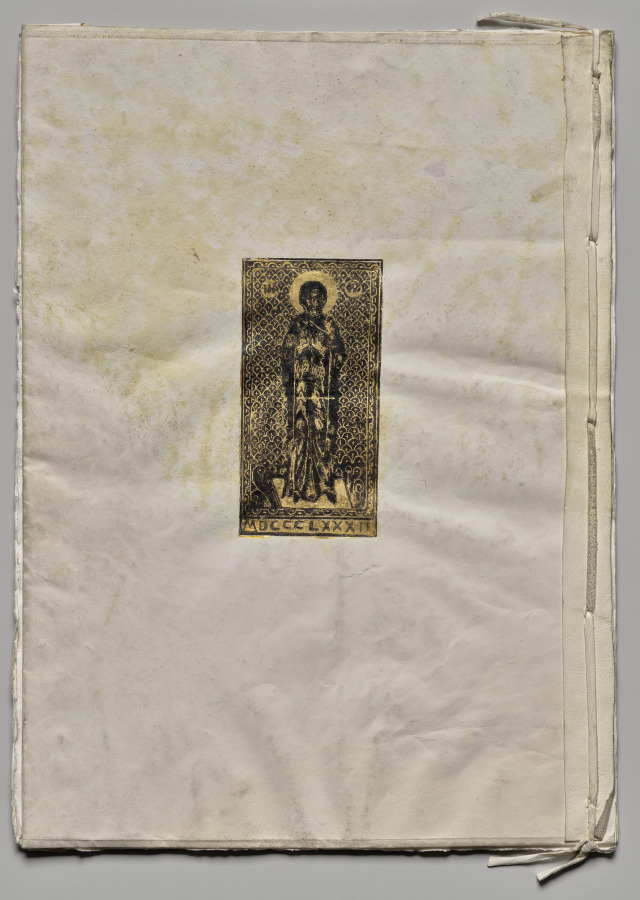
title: Etchings of Venice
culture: America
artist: Otto H. Bacher (American, 1856–1909)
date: 1881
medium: etching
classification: Print